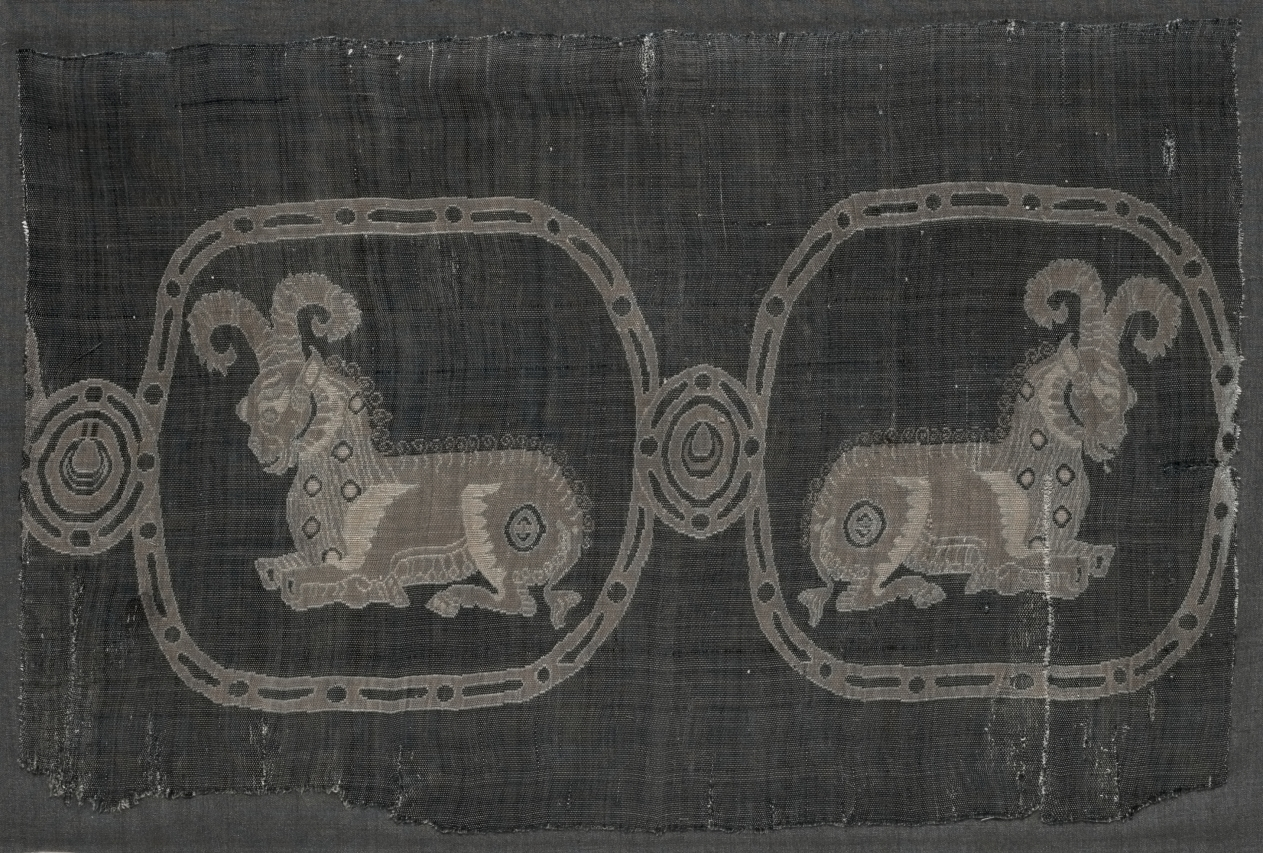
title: Fragment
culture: Iran, style of the Abbasid period (750–1258)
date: before 1981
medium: Silk: compound tabby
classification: Textile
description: The fragment preserves two oval compartments from a design of linked ovals each containing a recumbent ibex. The ibexes are addorsed linking each compartment to the next is a concentric oval device containing in the center a crescent moon. The design in pale blue, tan, and cream on a deep navy blue ground is oriented at right angles to the warp.